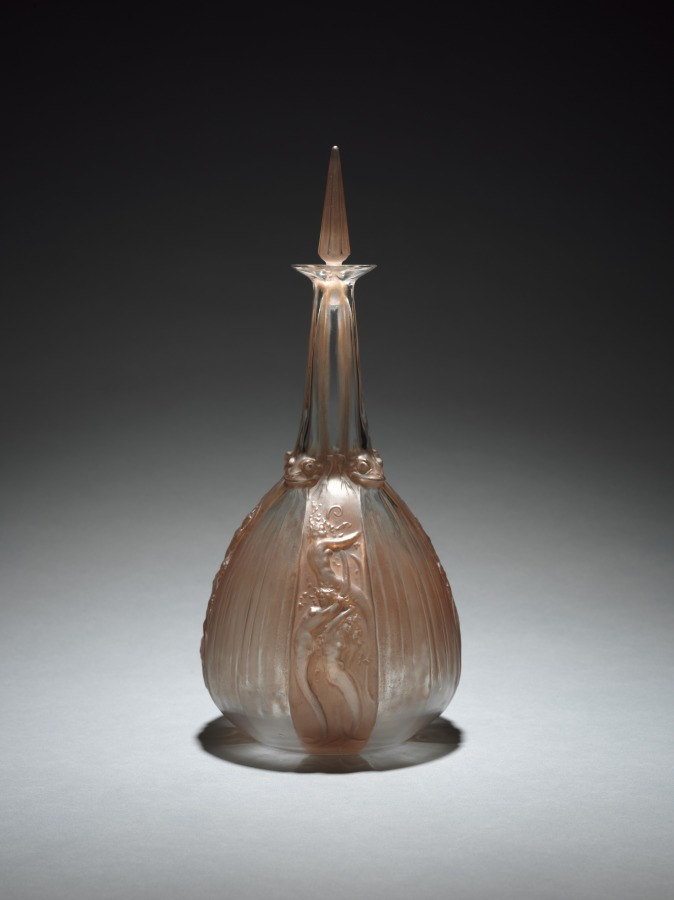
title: Mermaids and Frogs Decanter (Carafe sirènes et grenouilles)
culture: France, 20th century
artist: René Lalique (French, 1860–1945)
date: 1917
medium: glass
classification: Glass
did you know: The title of this work translates to mermaids and frogs carafe.